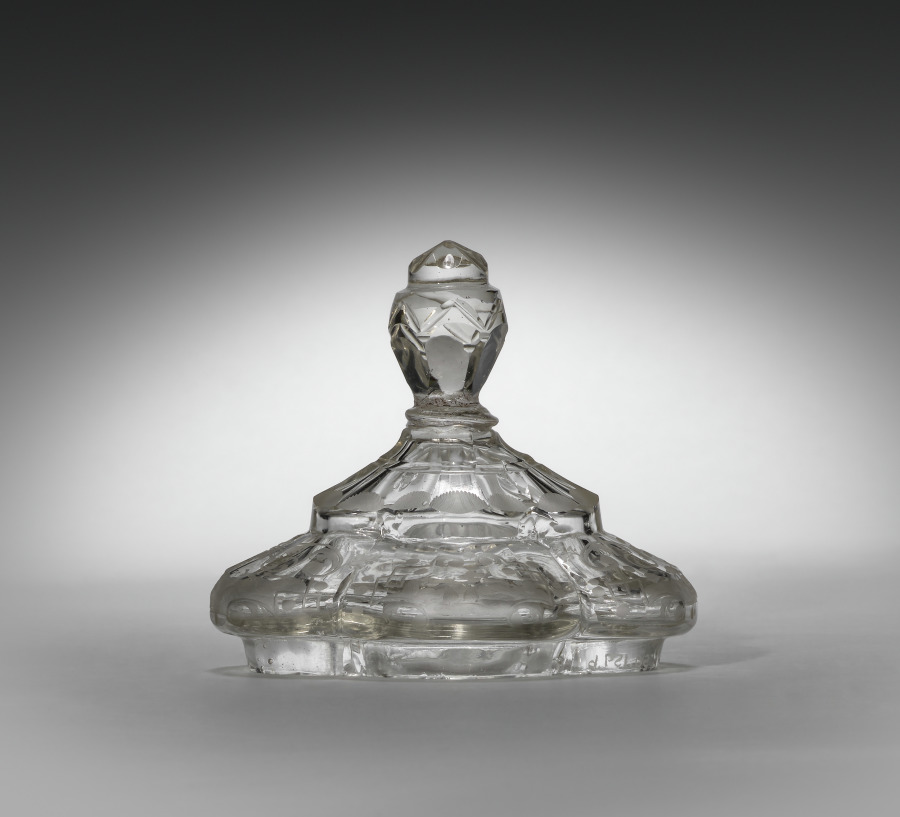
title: Cover for a Standing Cup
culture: Germany, Silesia, 18th century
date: c. 1725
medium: glass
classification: Glass